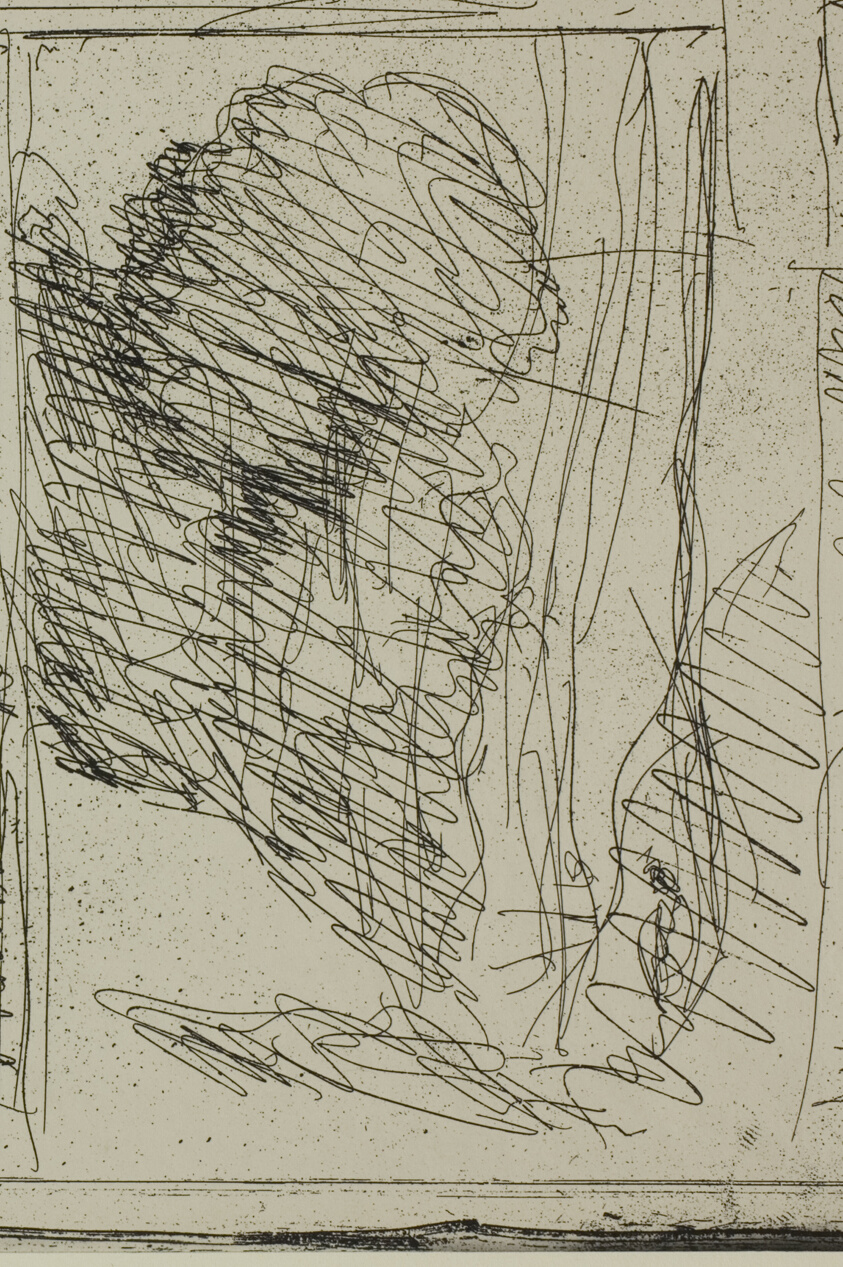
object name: Print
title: The Woodcutter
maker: Jean-Baptiste-Camille Corot; French, 1796-1875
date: 1856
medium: Cliché-verre on ivory photographic paper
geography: France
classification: cliché-verre; print; prints and drawing